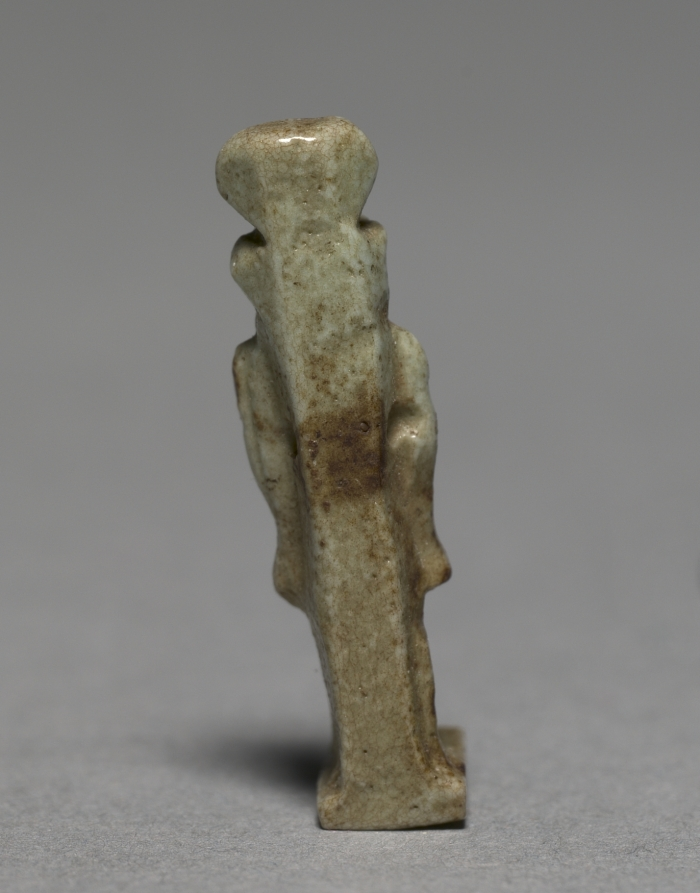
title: Amulet of Ra-Horakhty (?)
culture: Egypt, Late period (715–332 BCE), Dynasty 30–Greco-Roman period (332 BCE–395 CE), Ptolemaic dynasty (305–30 BCE)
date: 380–30 BCE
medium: gray green faience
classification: Amulets